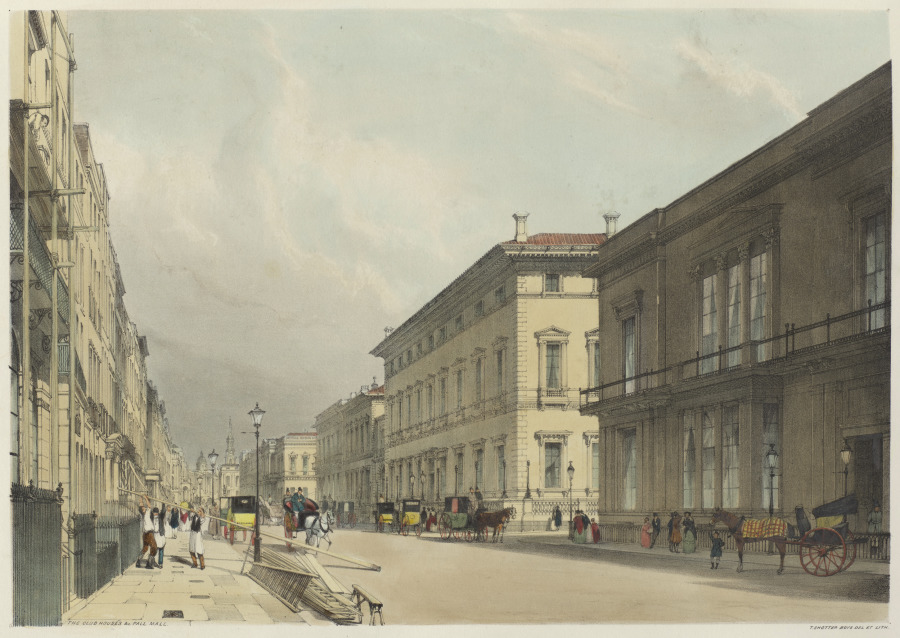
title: London As It Is: The Club-Houses, Pall Mall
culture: England, 19th century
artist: Thomas Shotter Boys (British, 1803–1874)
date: 1842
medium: lithograph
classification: Bound Volume